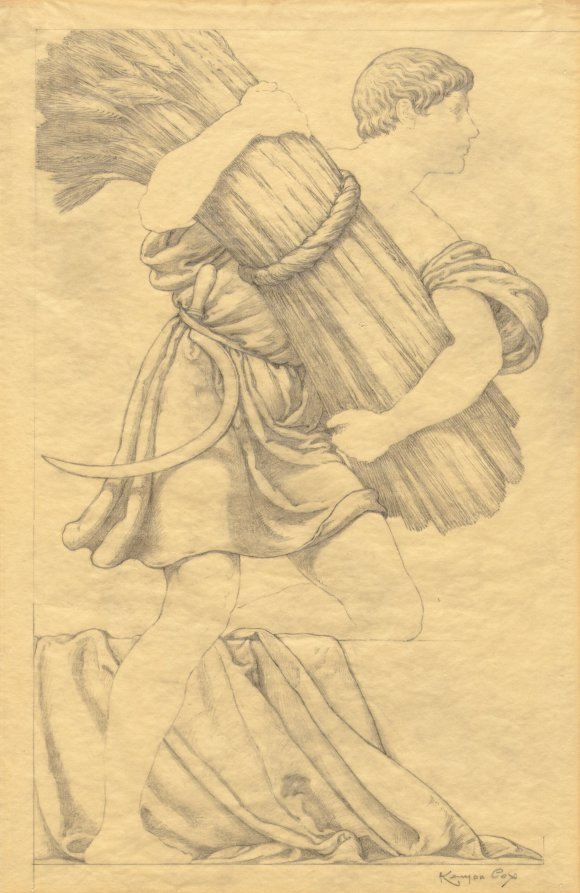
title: Sketch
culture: America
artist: Kenyon Cox (American, 1856–1919)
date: 1912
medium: graphite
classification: Drawing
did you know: This drawing is a preparatory sketch for United States currency, proposed during President Taft's administration.